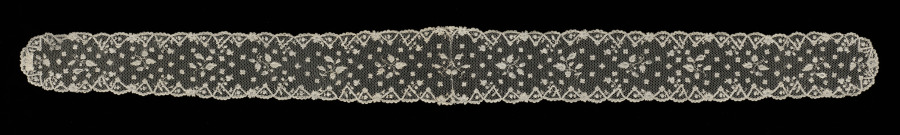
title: Lace Lappet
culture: France, Argentan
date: 1774–92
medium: Linen: needle lace (Point de Argentan)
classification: Lace